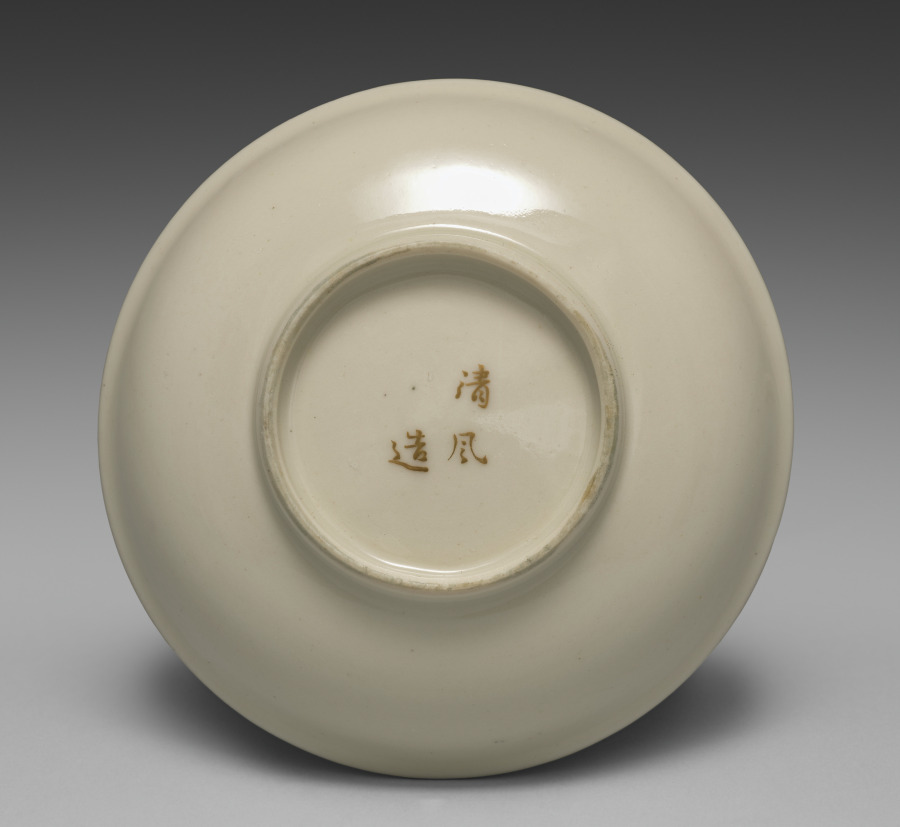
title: Small Dish from Dining Set with Plum Blossoms and Cracked-Ice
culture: Japan, Meiji period (1868–1912)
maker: Seifū Yohei II (Japanese, 1844–1878)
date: c. 1875–78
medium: Porcelain with molded designs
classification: Ceramic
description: Each item in this set has a delicate low-relief design of flowering plum branches over scattered, intersecting lines meant to resemble the cracked-ice surface of a frozen body of water and is signed on the base in gold pigment. While Yohei II produced many fine works in underglaze blue, like those produced by Kiyomizu Shichibei, he also made works in quite different styles later in his career, from the early 1870 s. In 1873, he was appointed purveyor to the Industrial Center of Kyoto Prefecture, a designation associated with Kyoto’s efforts to reach an international market through the port of Kobe; and from 1875 until his death, he was involved in national-level projects to present Japanese ceramics across the world. It was during this period that Yohei III was apprenticed to Yohei II, and it has been suggested that this set may in fact be an early example of Yohei III’s work, which he signed with his teacher’s name. Decorated with flowers resembling Japanese textile motifs, the set calls to mind the design of Yohei II’s pair of vases with plum blossoms in the Victoria and Albert Museum. Here, the elaborate trees created for a formal public exhibition setting have been translated into the approachable blossoms of the genteel domestic environment. While the designs are consistent across the pieces, each raised flower petal and pistil and each incised line in the ice was done by hand, so the cups, bowls, and dishes are similar yet unique. The bottoms of two boxes once identified the set’s owner, but the information has been deliberately obscured with black ink. However, inscriptions still visible appear to indicate two occasions, once at the end of July 1886 , and once again in June 1916 , when parts of the set were requested from Hokura in Niigata Prefecture. The location corresponds to a neighborhood in the present-day city of Jōetsu. The surname Tsuji 辻 also appears on a paper tag affixed to one of the box cloths. Future research may possibly reveal more about their provenance. A vase by Yohei III in a private collection combines the formal grandeur of the Yohei II vases in the Victoria and Albert Museum with the gentler design of this dining set, placing flowering plum trees against soft, scalloped-edge clouds resembling those in golden screens.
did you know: The dining wares have a creamy white coloration that the four boxes containing them identify as Korean in style.